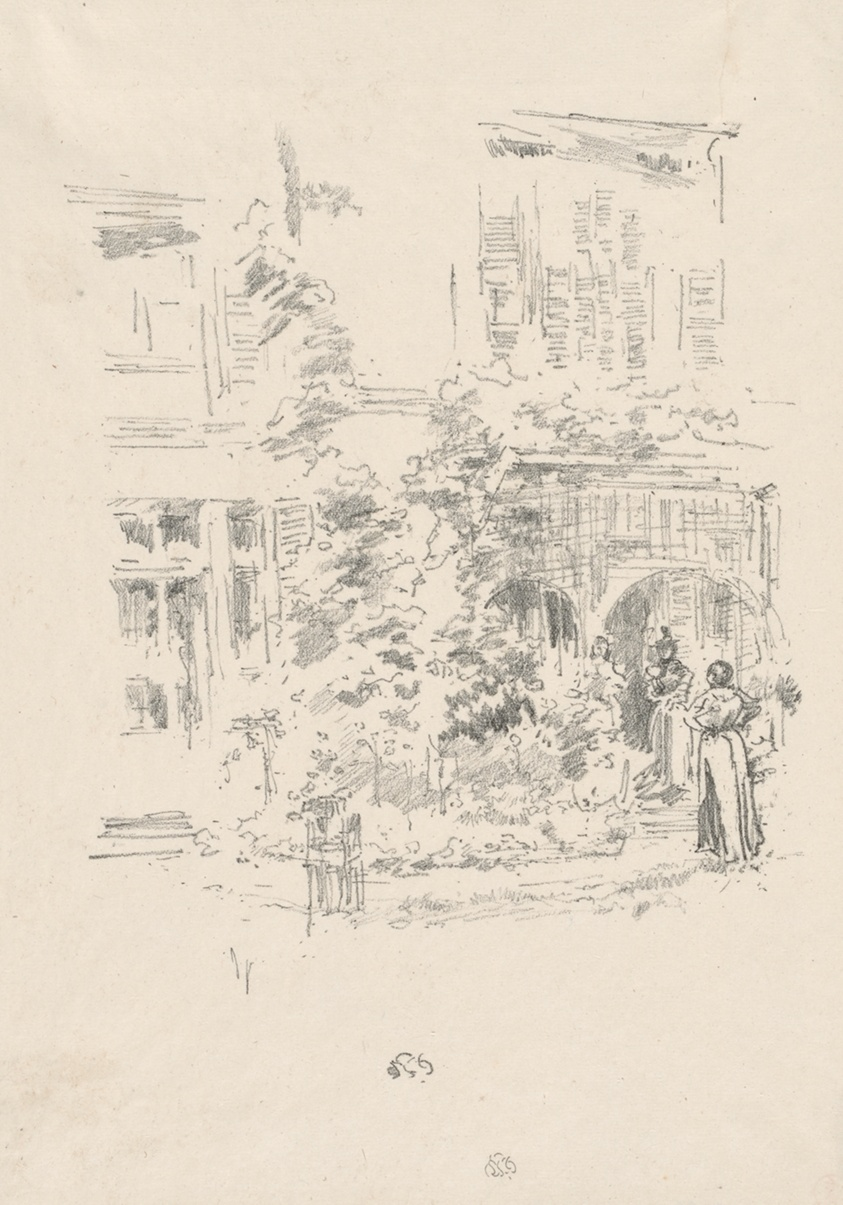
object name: Print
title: The Garden Porch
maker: James McNeill Whistler (American, 1834-1903)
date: 1894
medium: Transfer lithograph in black on ivory laid proofing paper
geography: United States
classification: transfer lithograph; lithograph; print; prints and drawing; paper